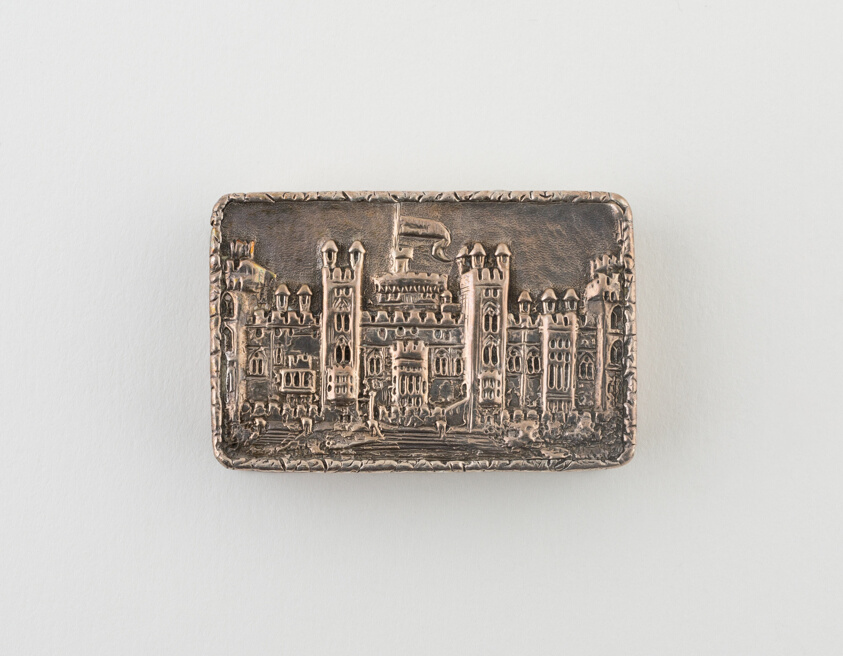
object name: Metalwork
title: Vinaigrette with View of Windsor Castle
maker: Nathaniel Mills; Birmingham, England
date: 1837/38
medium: Silver and silver gilt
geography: Birmingham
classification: container for personal use; vinaigrette (container for health care); european decorative arts; metalwork; silver; decorative object/ornament